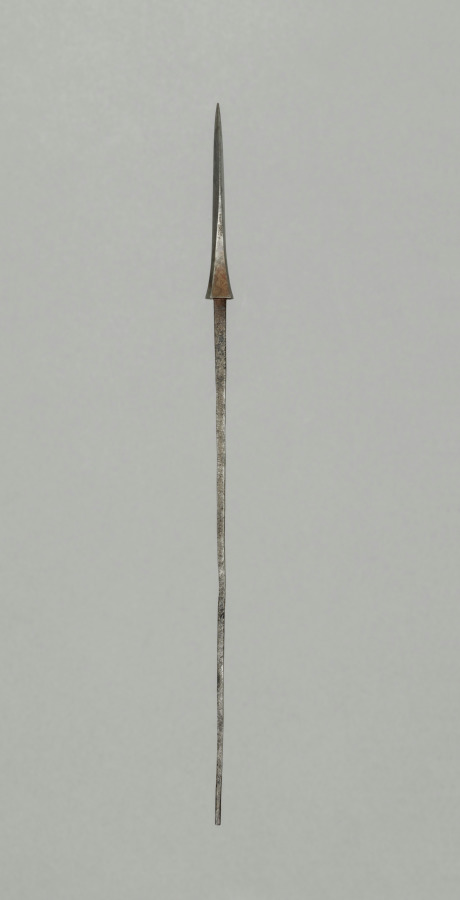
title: Arrow Point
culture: Japan, Edo period (1615–1868)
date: 1700s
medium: steel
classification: Arms and Armor